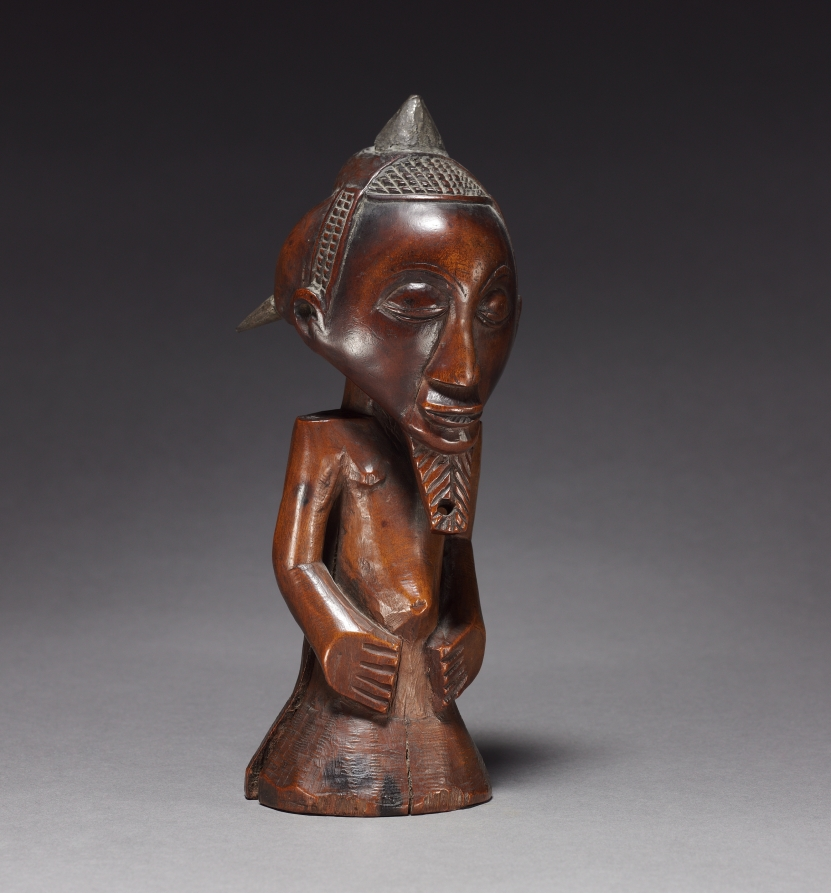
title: Half-Figure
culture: Africa, Central Africa, Democratic Republic of the Congo, probably Kusu-style maker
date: late 1800s–early 1900s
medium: Wood and iron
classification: Sculpture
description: Iron tacks inserted into the lobes of the hairdo indicate that this sculpture was originally empowered with magical and medicinal substances. Thus charged, the figure would have been used in divination and was related to a powerful association known as Bugabo. Members specialized in healing, hunting, and fighting crime.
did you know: This figure would have been used in a powerful association known as Bugabo, specializing in healing, hunting, and fighting crime.